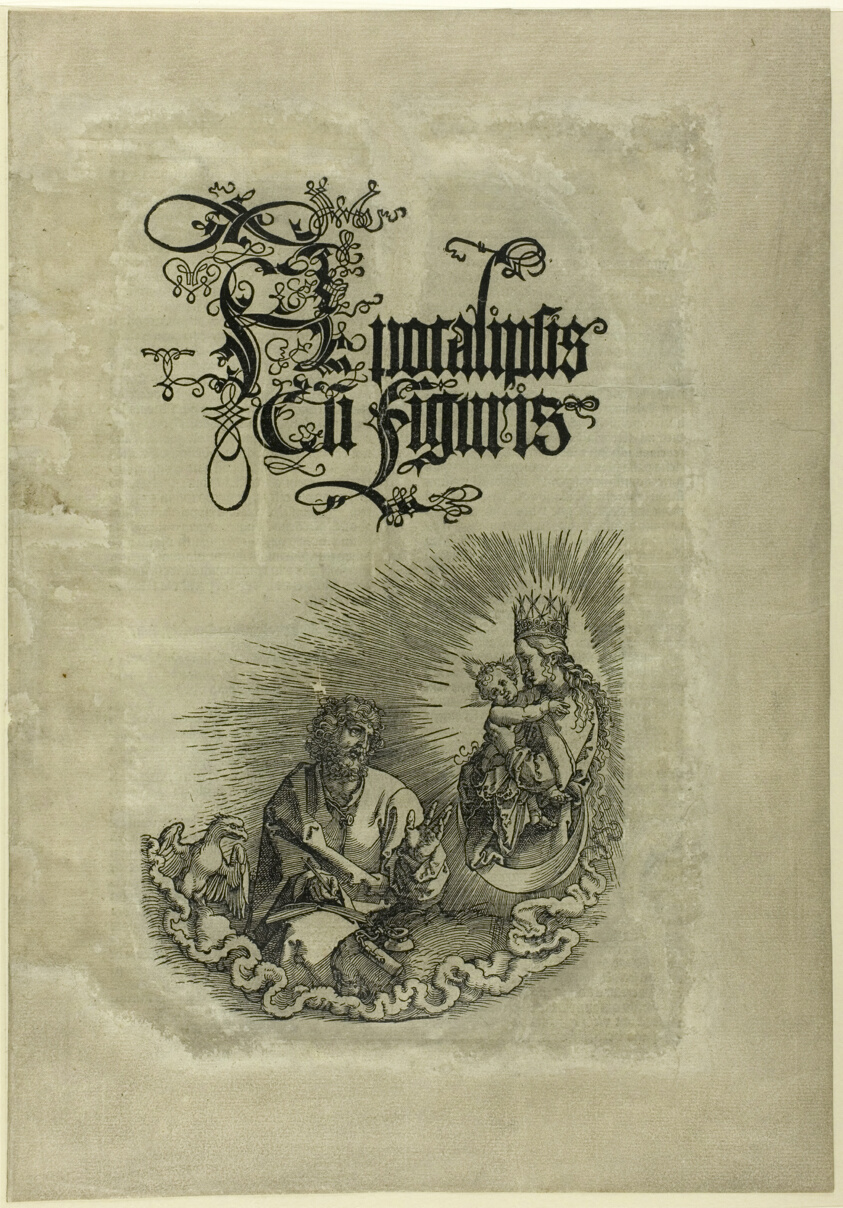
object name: Print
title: The Virgin Appearing to St. John, from The Apocalypse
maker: Albrecht Dürer (German, 1471-1528)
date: c. 1511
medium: Woodcut in black on ivory laid paper discolored to gray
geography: Germany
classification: woodcut; print; prints and drawing; paper